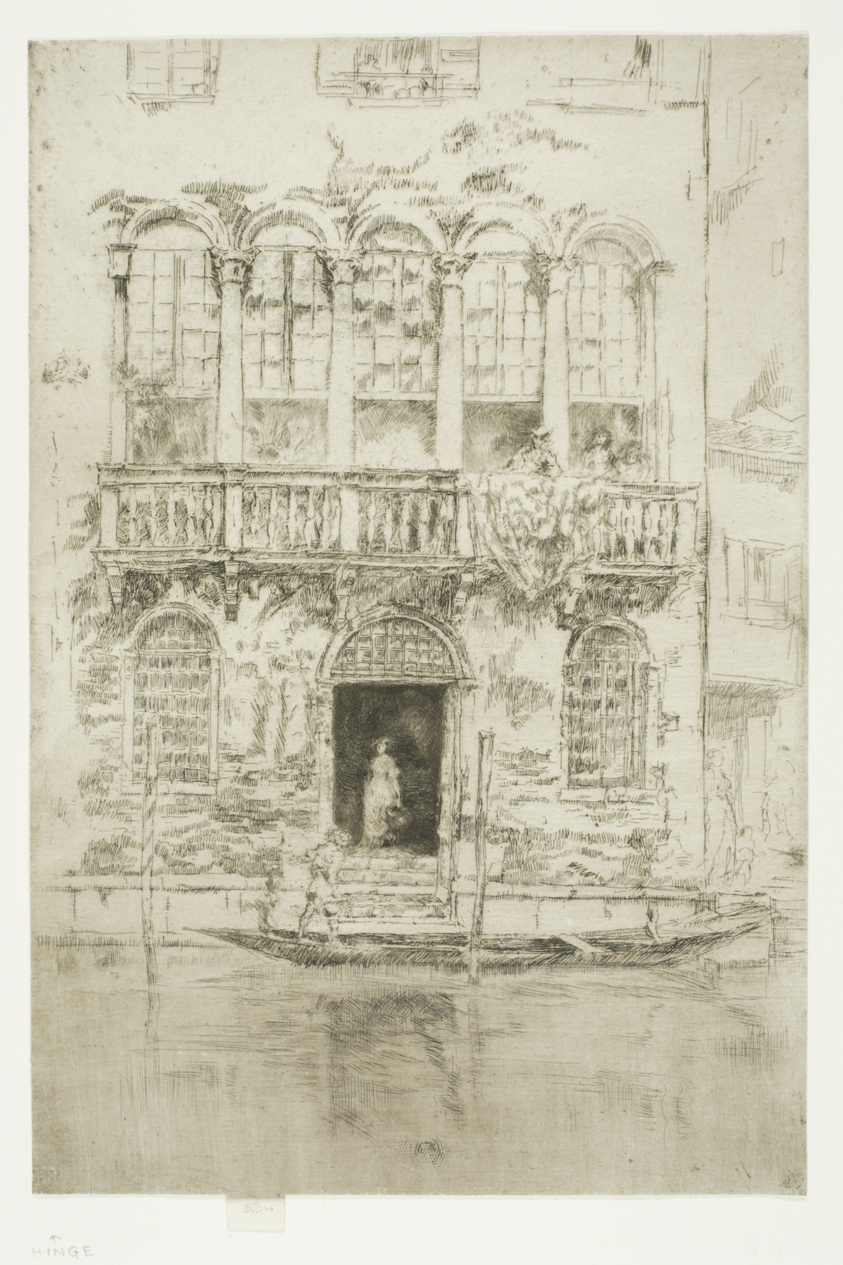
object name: Print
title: The Balcony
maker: James McNeill Whistler (American, 1834-1903)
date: 1879/80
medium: Etching and drypoint with foul biting in dark brown ink on ivory laid paper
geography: United States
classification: etching; foul biting; print; prints and drawing; drypoint; paper